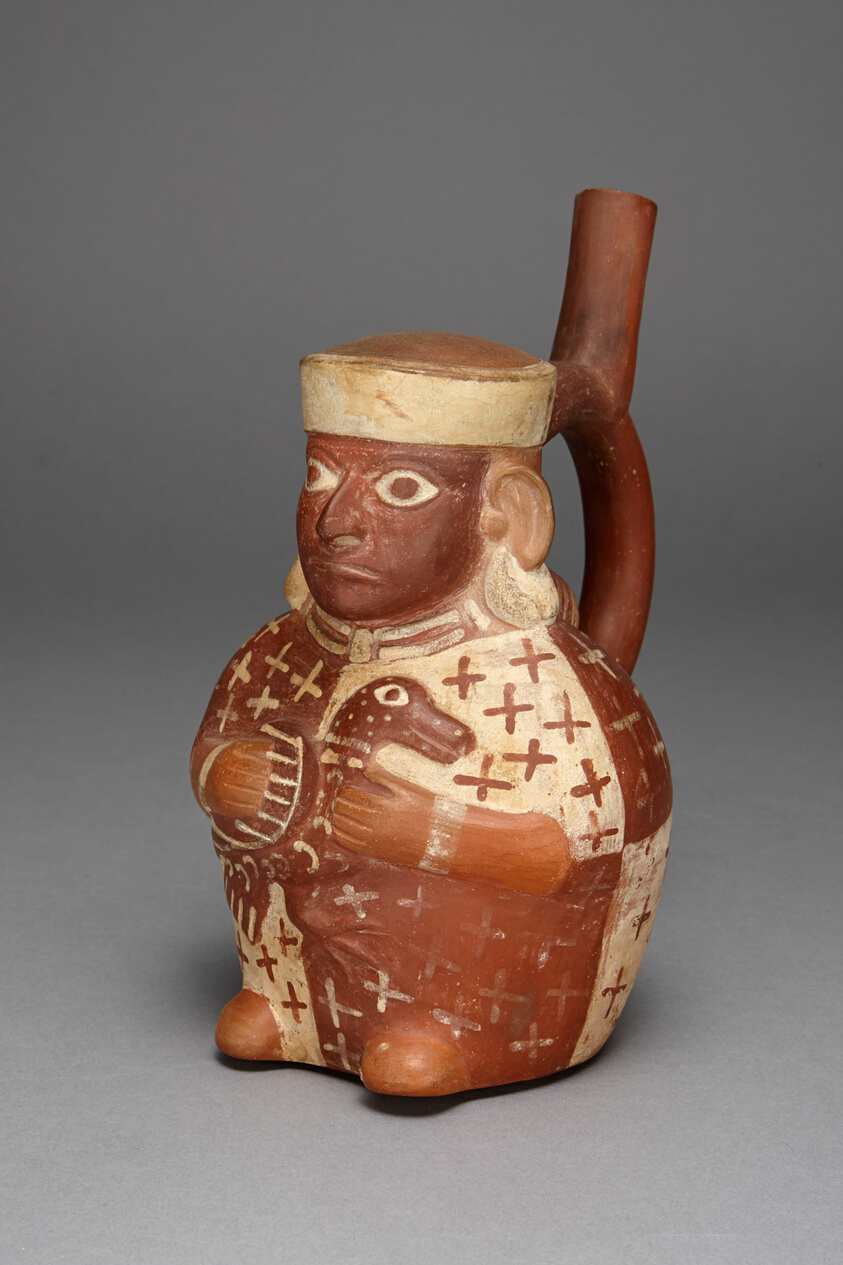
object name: Vessel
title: Vessel in the Form of a Seated Figure Holding a Duck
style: moche, mochica, early intermediate period, Pre-Columbian, americas, Arts of the Americas, andean, andes, south american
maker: Moche (North coast, Peru)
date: 100 BCE–500 CE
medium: Ceramic and pigment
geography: Moche Valley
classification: earthenware; ceramics; vessel; art of the americas